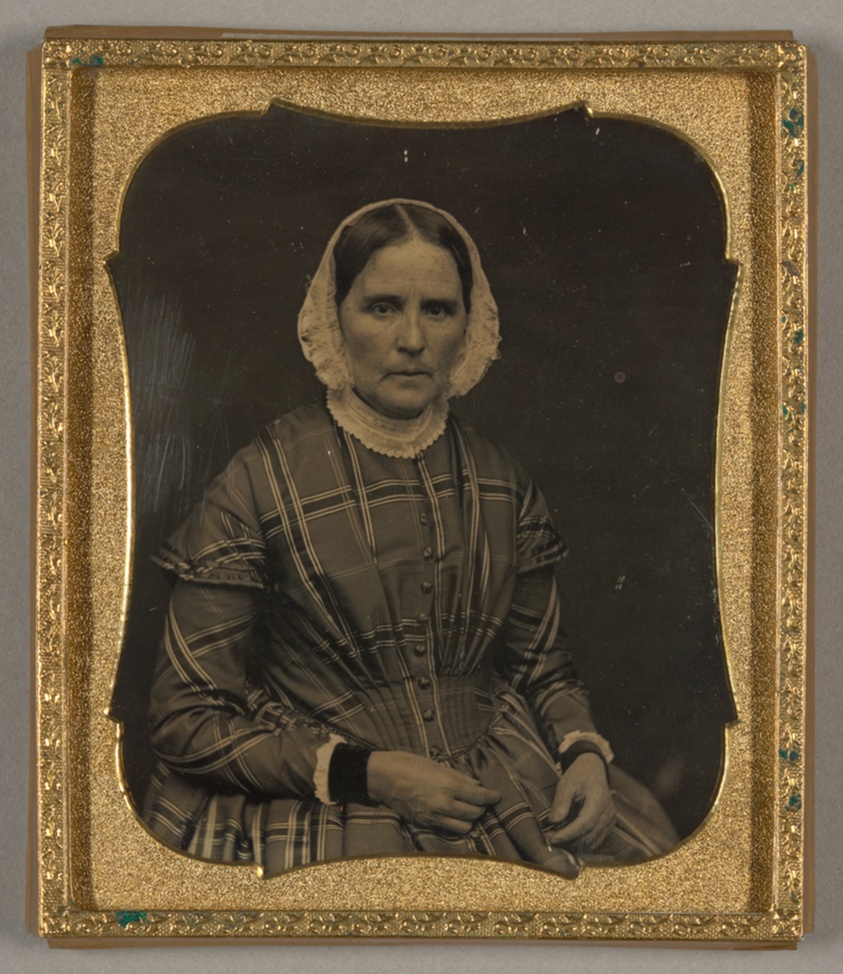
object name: Photograph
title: Untitled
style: 19th century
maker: Artist unknown; 19th century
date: 1839/60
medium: Daguerreotype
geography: Unknown Place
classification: daguerreotype; photographic process; photography; photograph